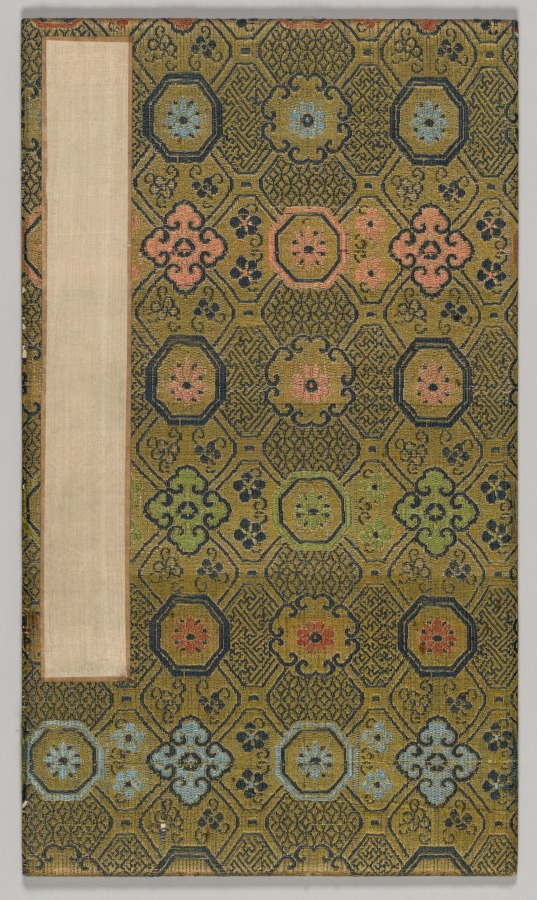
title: Reverberations of Taiga (Volume 1)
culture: Japan, Edo period (1615–1868)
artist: Aoki Shukuya (Japanese, d. 1802)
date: mid- to late 1700s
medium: One of a pair of albums; ink, or ink and light color on paper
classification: Portfolio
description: Traditionally, young painters in Japan began their studies with an established master-painter. The master's compositions invariably became models that the apprentice copied to learn various ink and brush techniques. Shukuya was a pupil of the famous Kyoto artist Ikeno Taiga, whose style is reflected in these sketches of rocks, trees, and mountains.